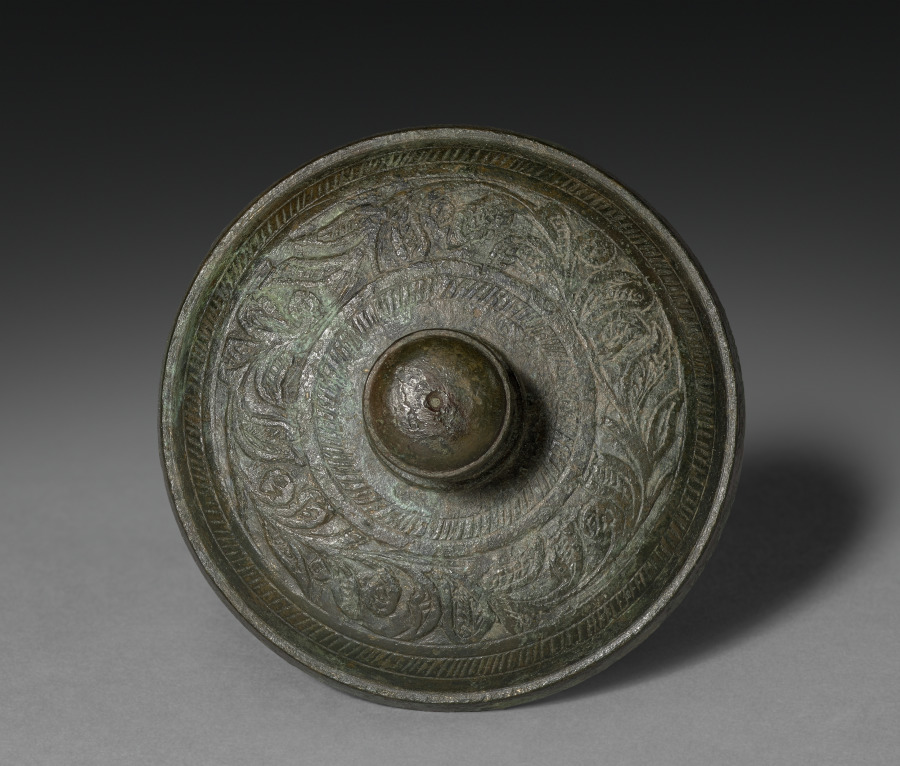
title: Reliquary Box (lid)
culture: Pakistan, Gandhara, probably Swat, late Kushan period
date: 200–400 CE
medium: bronze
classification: Metalwork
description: This casket in bronze represents the great variety of reliquary caskets. It is round, has a low foot, and is covered with a lid (with raised handle) that fits over the vessel rather than being inset. It is a traditional shape frequently encountered in Gandharan reliquaries, but its slight flattening and elaborate decoration imply a slightly late date. A central band of a floral creeper decorates the main body of the box and its lid, and is framed on both sides by narrower fluted bands. This type of freehand design is characteristic of the late Kusana-early Gupta period. Similar floral patterns are found in another CMA object (1972.164), the lid of a box showing combat between a man and a lion, which also dates to a later period. There the design fills the vacant areas in the busy composition. This pattern, however, has its antecedents in the Begram ivories . which, according to most sources, pre-date the Sasanian invasion of the mid-third century AD. Therefore, it can be assumed that this type of floral decoration was already in use in the third century and that this reliquary box probably dates to the third-fourth century AD. The bronze alloy, in its somewhat silverish-metallic appearance, seems to be very close to the material used in the Swat bronzes, which suggests that Swat may also be the provenance for this reliquary.